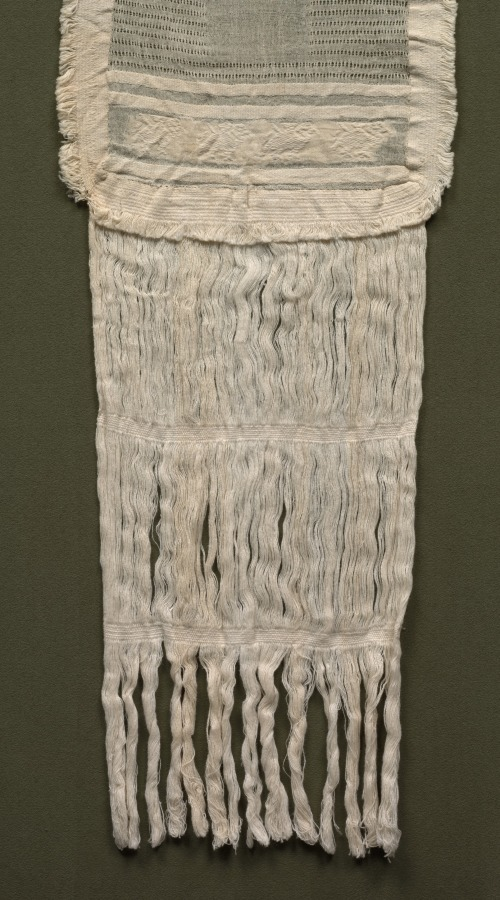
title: Turban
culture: Peru, North Coast, Chimú style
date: 1485–1640 (radiocarbon date, 95.4% probability)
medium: Cotton; plain weave, brocaded and complex alternating gauze with 5 shots of plain weave between gauze shots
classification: Garment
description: Chimú garments like this one consist of a large, rectangular central section—here measuring some 65 inches by 50 inches—with decorated tabs stitched to two opposite corners. Such garments probably were worn as turbans but we do not understand exactly how. For the purpose of display, the plain central section of this example has been folded to form a wide band, with the tabs arranged on either side.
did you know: The white cotton yarns used to make this textile are only 0.1 to 0.2 millimeters in diameter.